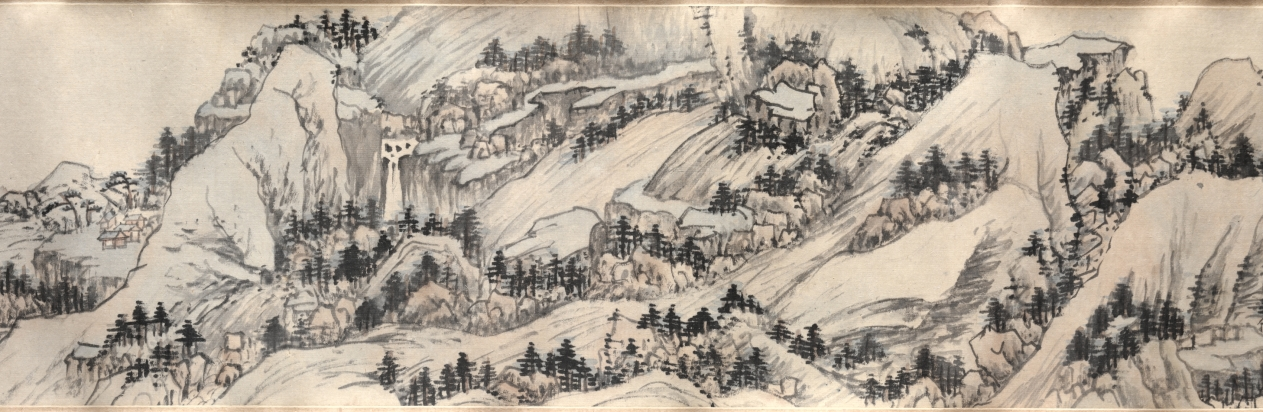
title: Dream Journey among Rivers and Mountains, no. 90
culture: China, Qing dynasty (1644-1911)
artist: Cheng Zhengkui (Chinese, 1604–1676)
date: 1658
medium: Handscroll; ink and color on paper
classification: Painting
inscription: 江山臥遊圖其九十, 青溪道人, 戊戌夏五。 [印] 程正揆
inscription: Title and inscription by Huang Yi 黃易 (1744–1802), and 3 seals.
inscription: 1 colophon and 9 additional seals: 3 seals of Dai Zhi 戴植 (active about 1821–1850); 1 colophon, dated 1914, and 3 seals of Yan Shiqing 顏世清 (1873–1929); 3 seals of Wang Nanping 王南屏 (1924–1985).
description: Cliffs and waterfalls interspersed with trees and dotted vegetation are spread over this handscroll. Long paths wind their way through villages, beside cottages, shrines, and over bridges. In the past, Chinese literati officials liked to take a “dream journey” along mountains and rivers when viewing landscape paintings in their studios. Scenery of this kind thus became a way to escape from the world of bureaucracy and administration. The painter Cheng Zhengkui used the title “Dream Journey” for a whole series of paintings, of which this is number 90. He is said to have painted 500 of them, but the actual count remains unknown.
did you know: Cheng Zhengkui planned to make 100 dream journey paintings but may have ultimately made 500.